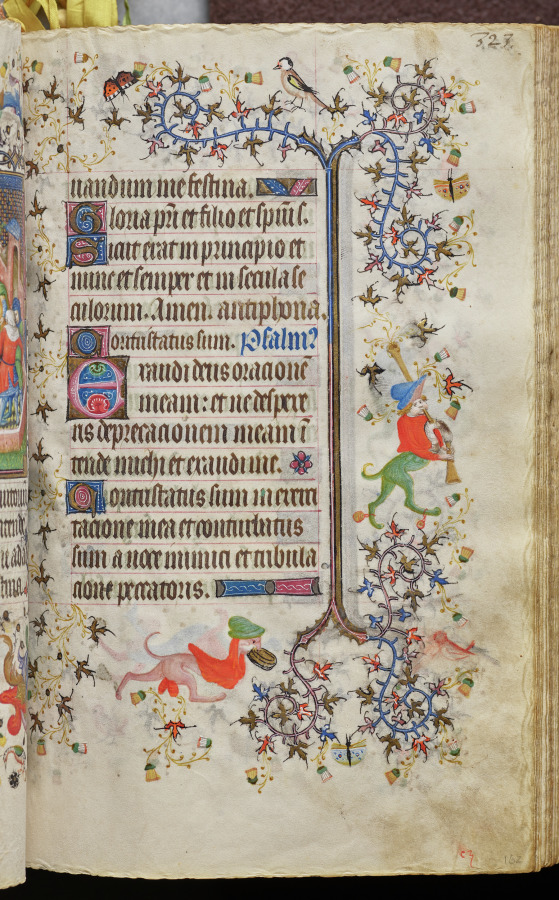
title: Hours of Charles the Noble, King of Navarre (1361-1425): fol. 162r, Text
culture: France, Paris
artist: Master of the Brussels Initials and Associates (French)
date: c. 1405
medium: ink, tempera, and gold on vellum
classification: Bound Volume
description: This precious volume was obviously highly prized by its owner, the French-born King of Navarre, who had his coat of arms painted on no less than twenty folios. Rather than directly commissioning this manuscript from a specific workshop, it seems that Charles the Noble acquired his book of hours -- perhaps ready-made for the luxury market -- while on a trip to Paris in 1404-05. A collaborative effort, six painting styles are evidenced within the pages of this codex, those of two Italians, two Frenchmen, and two Netherlanders. The painter who was responsible for the planning and decoration of the book, and who produced seventeen of the large miniatures, was a Bolognese artist known as the Master of the Brussels Initials. His principal assistant, responsible for most of the borders, was a Florentine who signed his name "Zecho" da Firenze on folio 208 verso.